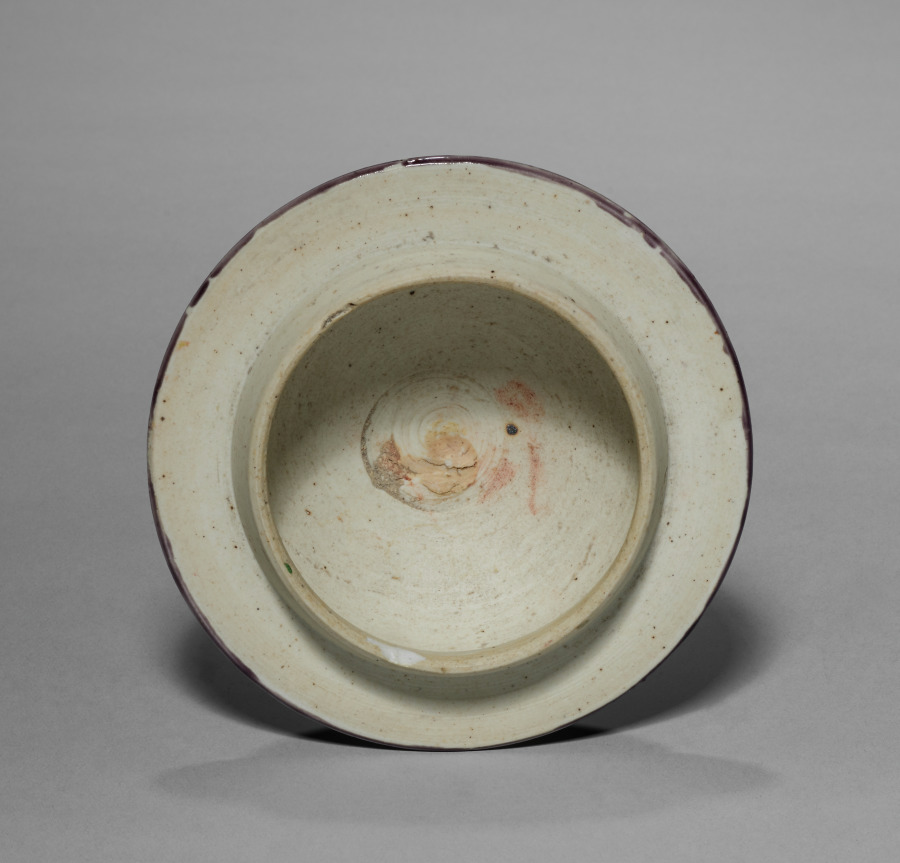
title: Baluster Jar and Cover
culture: China, Jiangxi province, Jingdezhen kilns, Ming dynasty (1368–1644) or Qing dynasty (1644–1911)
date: 1600–1650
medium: Porcelain with wucai (five-color) enamels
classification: Ceramic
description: The central motif on this jar is a mountain emerging from the sea, symbolizing Mount Sumeru in Buddhist cosmology, and representing the central axis in the universe in Daoism. White cherry blossoms floating on the wavy ground are surrounded by auspicious symbols such as the coin for wealth and the lozenge for victory. The yellow knob on the jar’s cover depicts a cherry blossom. Other fortuitous motifs—such as the leaf of protection, the pearl to grant wishes, the stone chime for celebration, rocks symbolizing longevity—also decorate the lid. While most jars have lost their covers over time, this jar retains its original lid.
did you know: The waves are depicted in a rich aubergine, or purple, glaze.